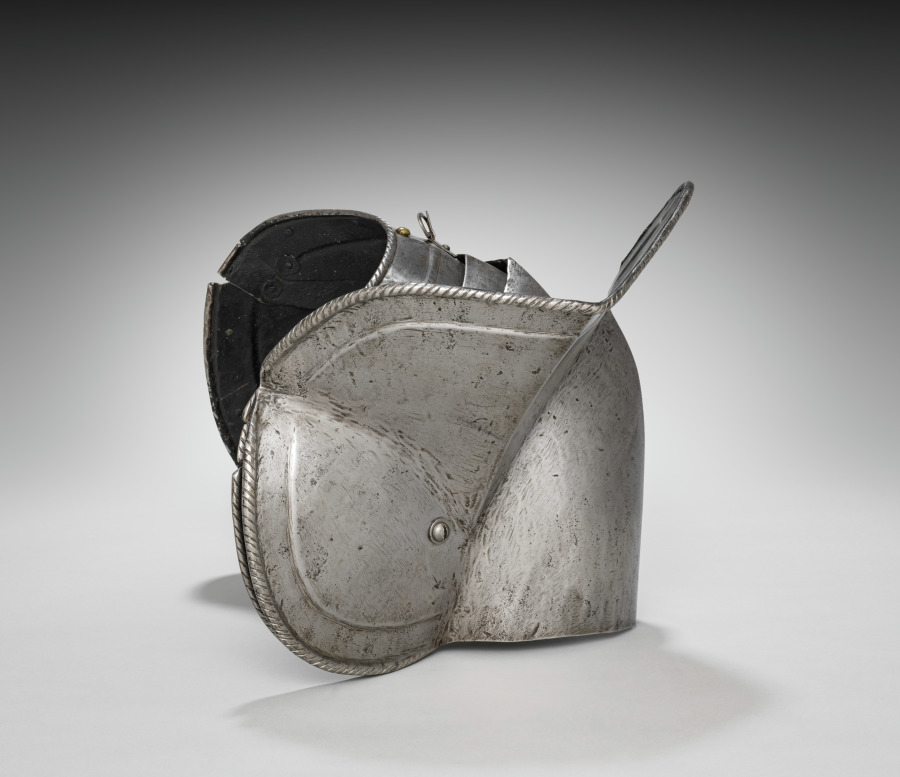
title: Pauldron (proper left) and Grandguard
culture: South Germany, 16th century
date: c. 1560–1580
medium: steel, leather straps, brass rivets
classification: Arms and Armor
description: This armor was developed for the joust--a sporting combat between two mounted contestants. Although all of the elements of this armor date from the same period, they are not all from the same suit. This armor is thus called "composed." It also shows the asymmetry of jousting armor. The participants rode along a wall-like barrier known as a "tilt" with their left sides facing one another. Consequently, armor on that side of the body had to be thicker. Note the large plate (grandguard) over the left shoulder for extra protection. Also, the breathing holes in the helmet were placed on the right side (farthest from an opponent's lance) to avoid injuries from splinters. The bracket attached to the right breastplate is called the lance-rest, a shock-absorbing support designed to accommodate the lance when "couched" under the right armpit.